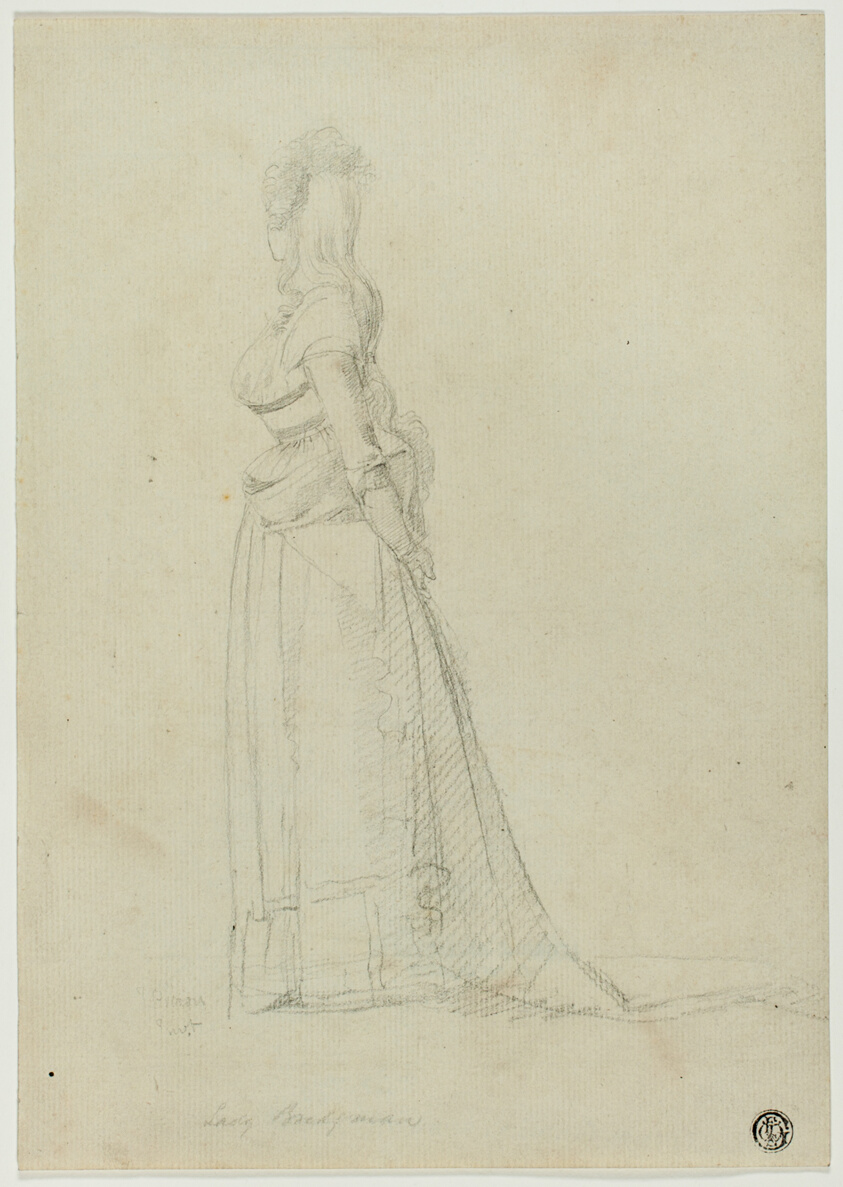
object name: Drawing and Watercolor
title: Lady Bridgeman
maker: John Brown (Scottish, 1752-1787); or Thomas Gainsborough (English, 1727-1788)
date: 1780/1799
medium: Graphite on ivory laid paper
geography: Scotland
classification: graphite; drawings (visual works); prints and drawing